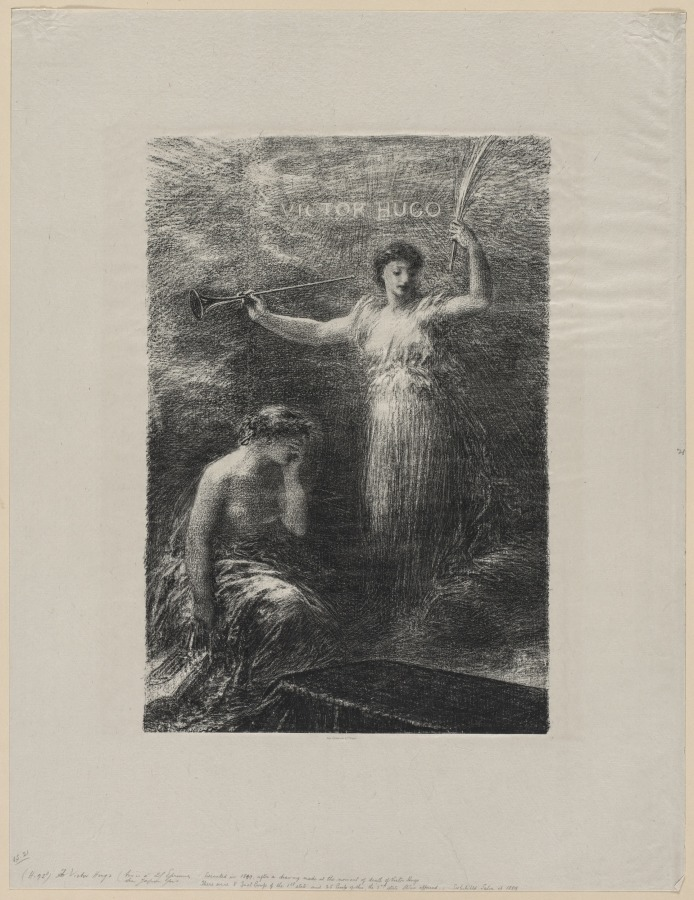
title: À Victor Hugo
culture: France, 19th century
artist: Henri Fantin-Latour (French, 1836–1904)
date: 1889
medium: lithograph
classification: Print